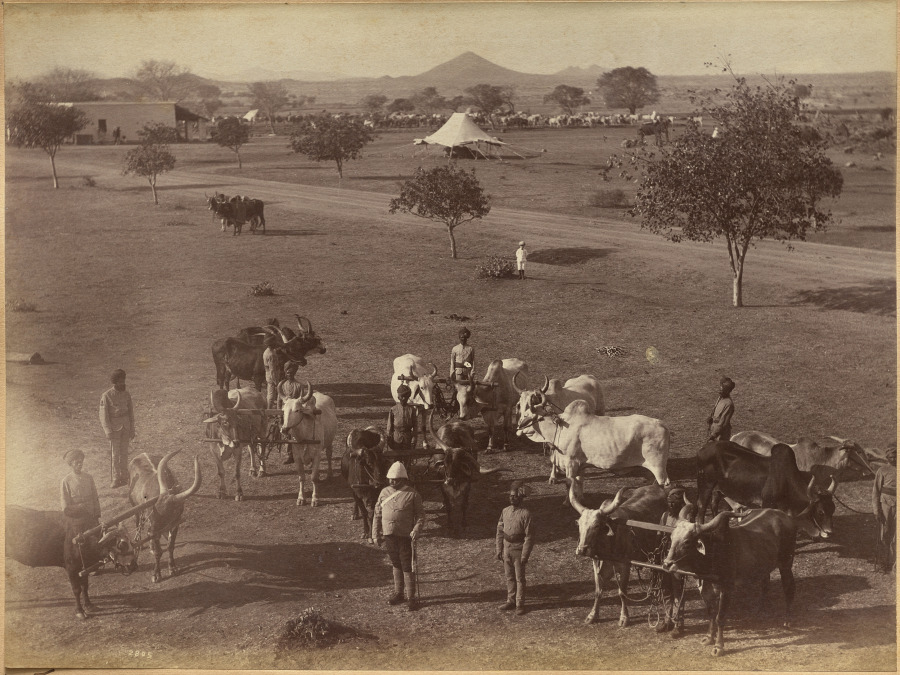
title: Bullocks of Elephant Battery, Jhansi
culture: India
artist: Raja Deen Dayal (Indian, 1844–1905)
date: c. 1882–87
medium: albumen print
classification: Photograph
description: These photographs are part of an album, now disassembled, of around 105 photographs taken in India between 1885 and summer 1887 that provide glimpses into the lives of the British colonial elite and royal and upper-class Indians. The museum holds another group of 37 pictures from this album (2016.266), which was probably commissioned by a British civil servant visiting or working in India around 1888 as a personal souvenir of his experiences there.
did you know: Raja Deen Dayal is regarded now, and was considered during his lifetime, to be India’s most important 19th-century photographer.